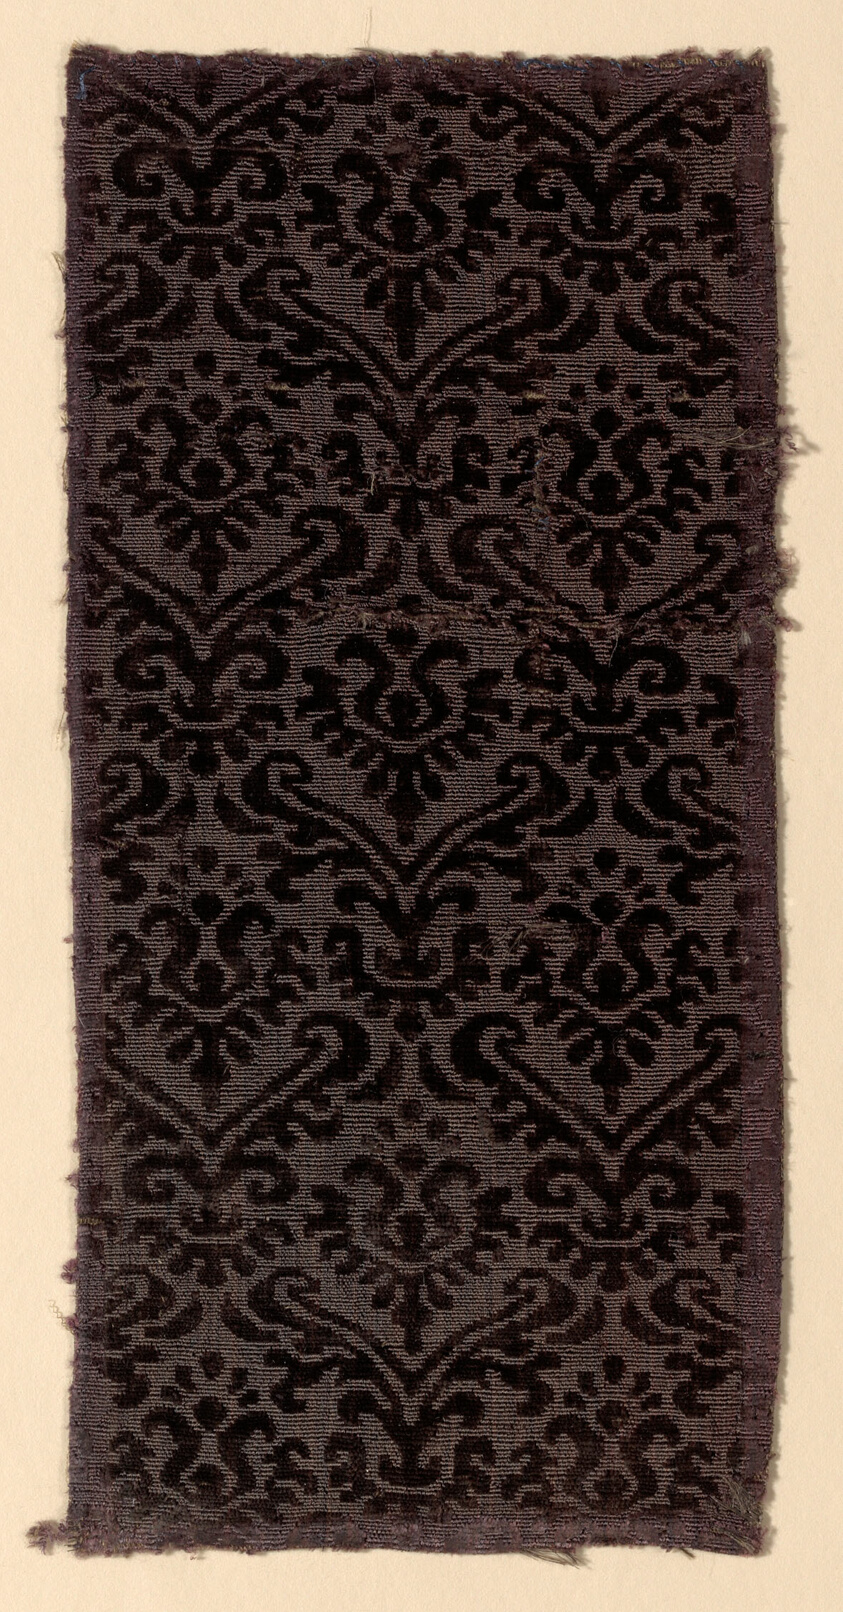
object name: Textile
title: Fragment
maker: Italy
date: 1675/1700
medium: cut velvet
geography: Italy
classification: textile; weaving - velvet